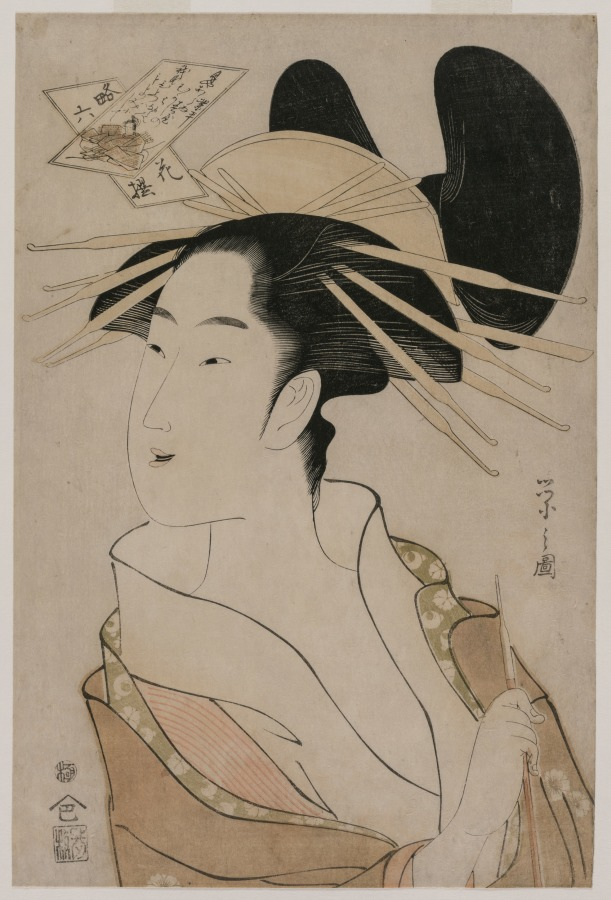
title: Portrait of a Courtesan Holding a Pipe (from the series The Six Immortal Poets in Modern Dress)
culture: Japan, Edo period (1615–1868)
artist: Chōbunsai Eishi (Japanese, 1756–1829)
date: mid 1790s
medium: color woodblock print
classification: Print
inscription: Signature: Eishi zu Seal: kiwame